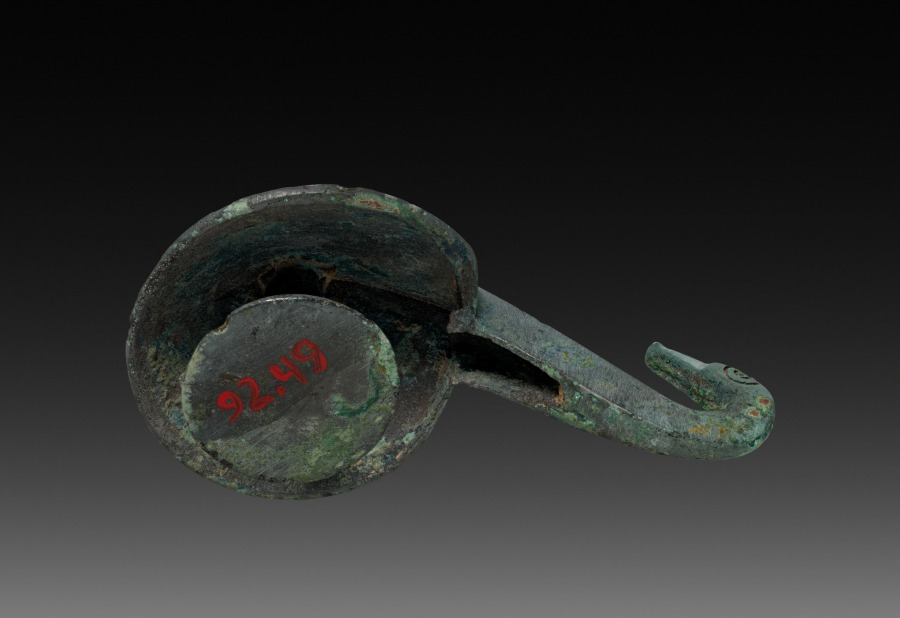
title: Belt Hook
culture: China, Eastern Zhou dynasty (770–256 BCE)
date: late 500s–early 400s BCE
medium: bronze inlaid with powdered azurite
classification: Metalwork